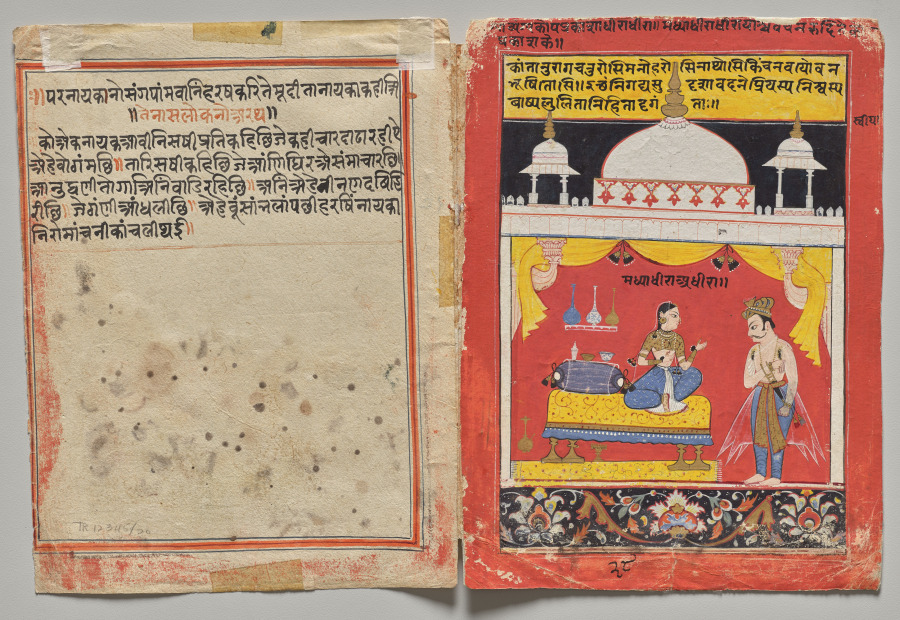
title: A Young, Angry Heroine, Folio 28 from a Rasamanjari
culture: Northwestern India, Rajasthan, Rajput Kingdom of Mewar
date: c. 1615–20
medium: Gum tempera, ink, and gold on paper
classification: Painting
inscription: Recto, upper center: You are expert in flirtation; you are charming; you are my lord and wonderful in your youthful handsomeness.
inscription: Recto, center: Madya Dhira Adhira.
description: The scene of a conversation between two lovers is set within a bedchamber, golden curtains pulled up. The heroine sits on the bed, with three long-necked wine vessels on the wall behind her. A brass ewer for washing with water is on the floor behind the bed.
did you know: Men applied fragrant black pastes to their underarms.